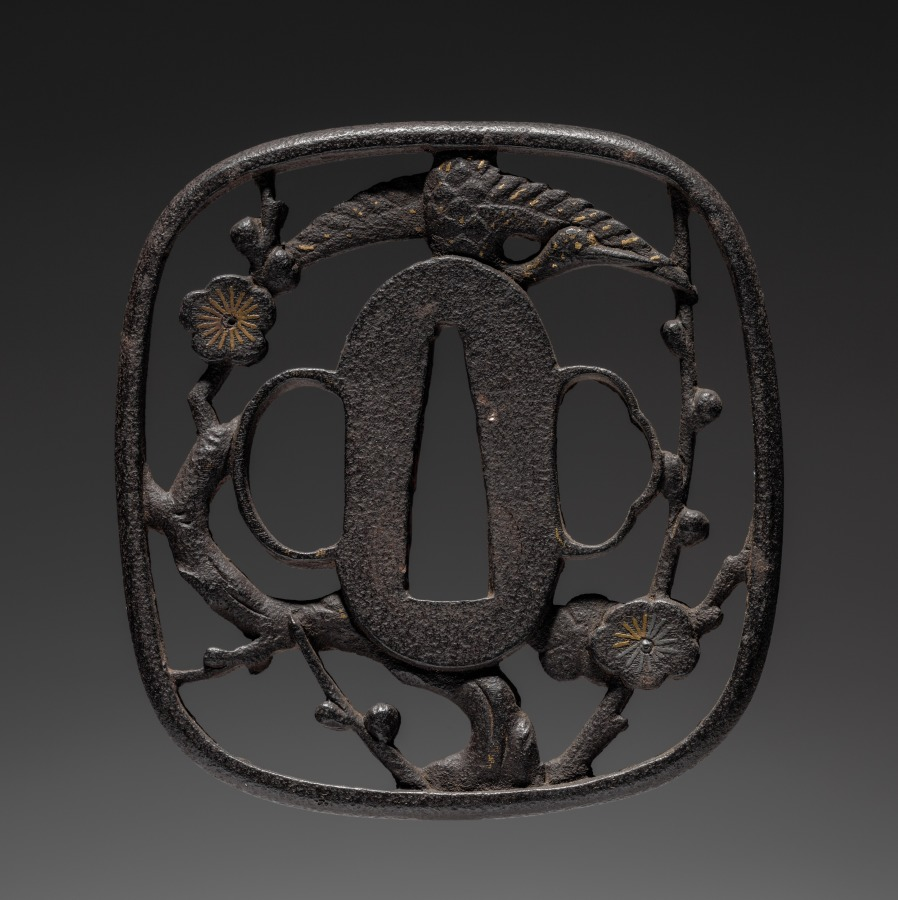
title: Sword Guard (Tsuba) with Crane and Plum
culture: Japan, possibly Edo period (1615-1868)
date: c. 1615–1868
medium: iron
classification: Arms and Armor